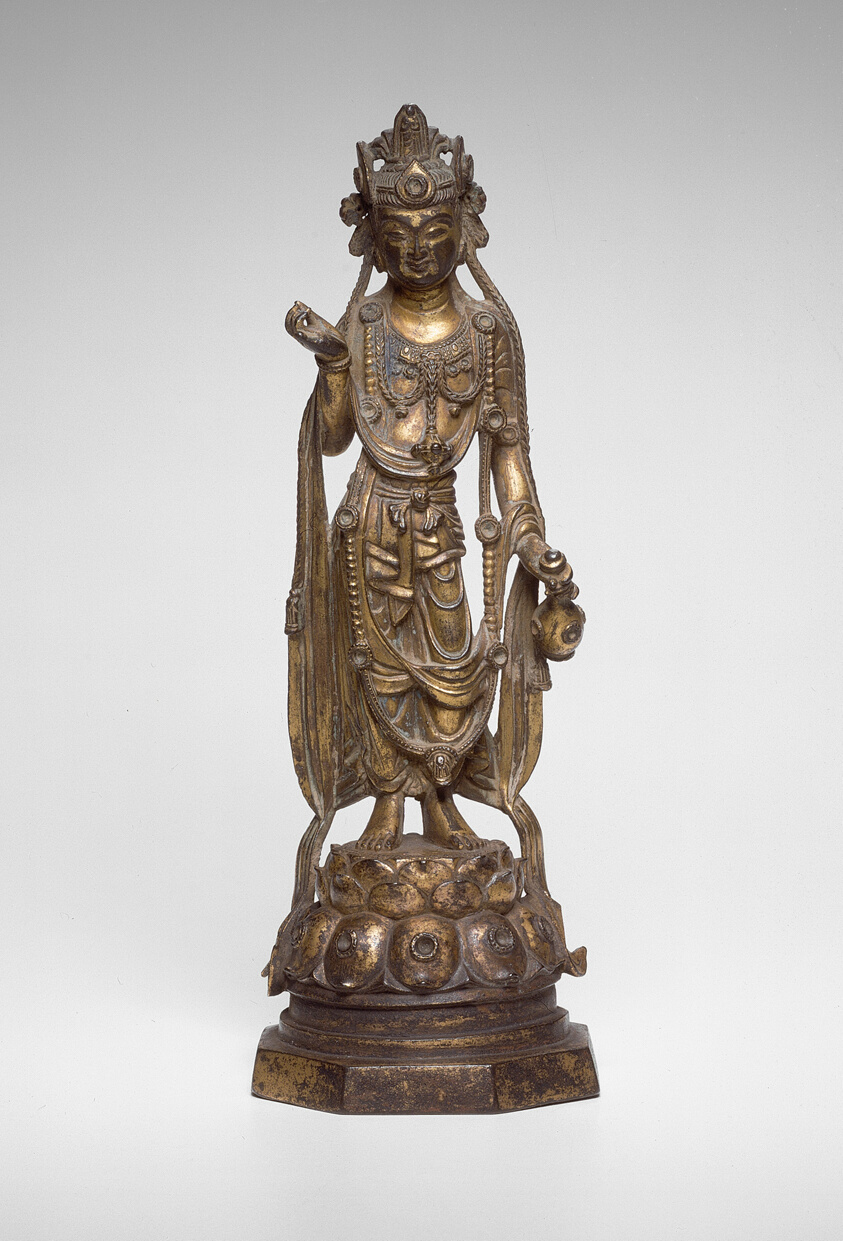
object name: Sculpture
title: White-Robed Guanyin (Avalokiteshvara) in "Thrice-Bent" Pose (Tribhanga), Holding a Vase with Nectar of Immortality (Amrta)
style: Chinese (culture or style)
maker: China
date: Sui dynasty (589–618), early 7th century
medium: Gilt copper alloy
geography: China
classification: vase; bronze; vessel; metal; sculpture; asian art